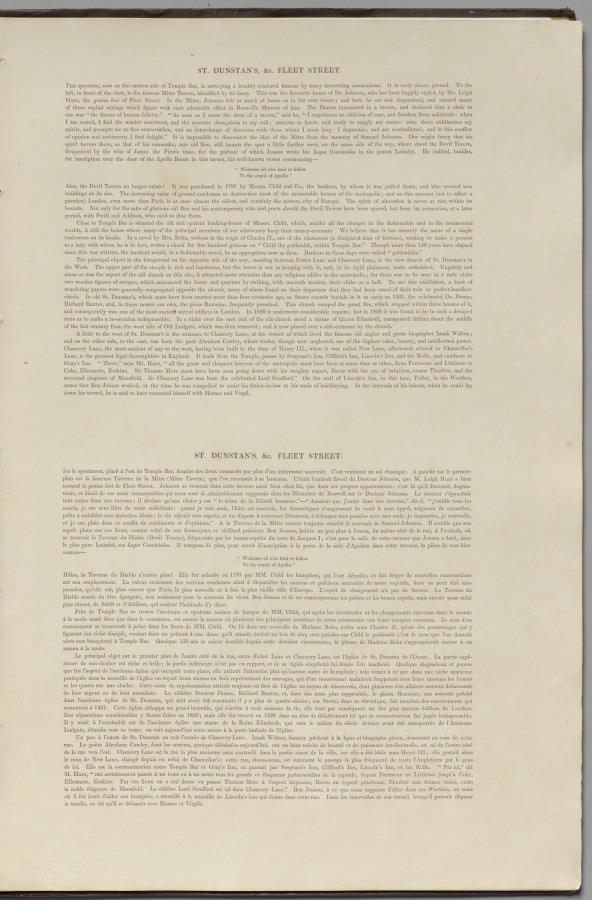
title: London As It Is: St. Dunstan's, Fleet Street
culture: England, 19th century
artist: Thomas Shotter Boys (British, 1803–1874)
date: 1842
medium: lithograph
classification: Bound Volume